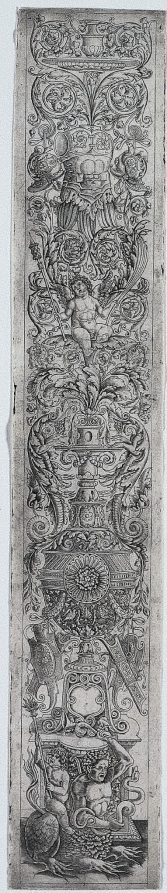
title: Ornamental Panel: Triton Ridden by a Child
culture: Italy, 15th century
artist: Giovanni Pietro da Birago (Italian, active c. 1471–1513)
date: c. 1505–15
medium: engraving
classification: Print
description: Printed ornamental columns—such as these flanking the portrait of Henry II—were probably colored and used for interior decorations. The printed panels may have also served artists and craftsmen creating similar patterns in other materials, including wood, stone, or metal. They have been imaginatively integrated into the display on this wall because their intricate designs feature pieces of armor and mythical creatures that echo those in the works around them.